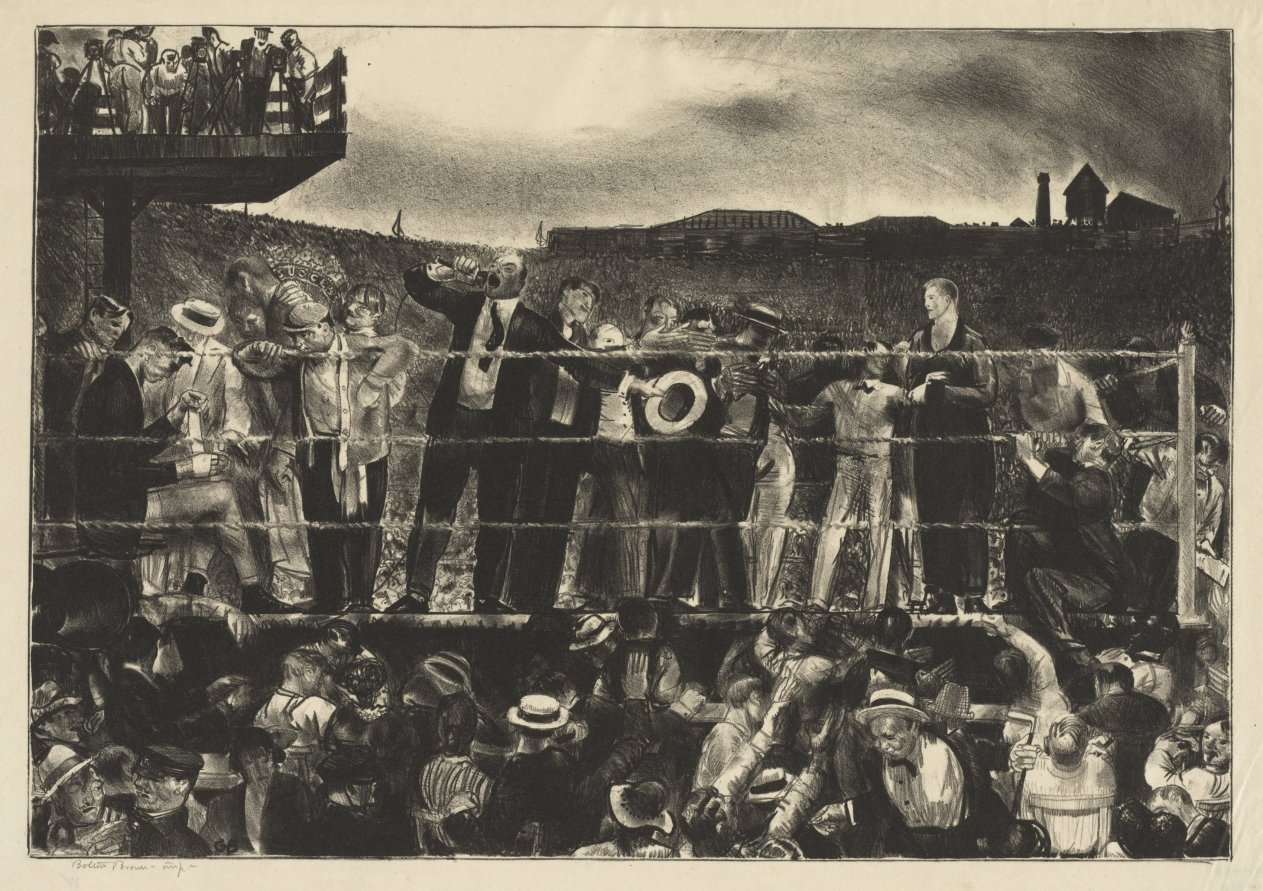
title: Introducing Georges Carpentier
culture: America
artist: George Bellows (American, 1882–1925)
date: 1921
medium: lithograph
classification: Print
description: Promoted as the “battle of the century,” the match between French pugilist Georges Carpentier and American Jack Dempsey took place on July 2, 1921, in Jersey City at an enormous outdoor arena built specifically for the bout. With the First World War fresh in mind, the crowd favored Carpentier, a twice-decorated pilot in the French Air Force, over Dempsey, who was viewed as a draft evader despite having been exonerated of the charge by a jury the previous year. The match ended quickly with a knockout by Dempsey in the fourth round. The event attracted more than 80,000 spectators and generated boxing’s first million-dollar gate. A large contingent of reporters, photographers, and motion picture cameramen—several of whom are gathered on a platform at the upper left—covered the spectacle. Bellows, on assignment for the New York World newspaper to sketch the proceedings, sat in the press section shown in the foreground, although he did not record himself among the excited throng.